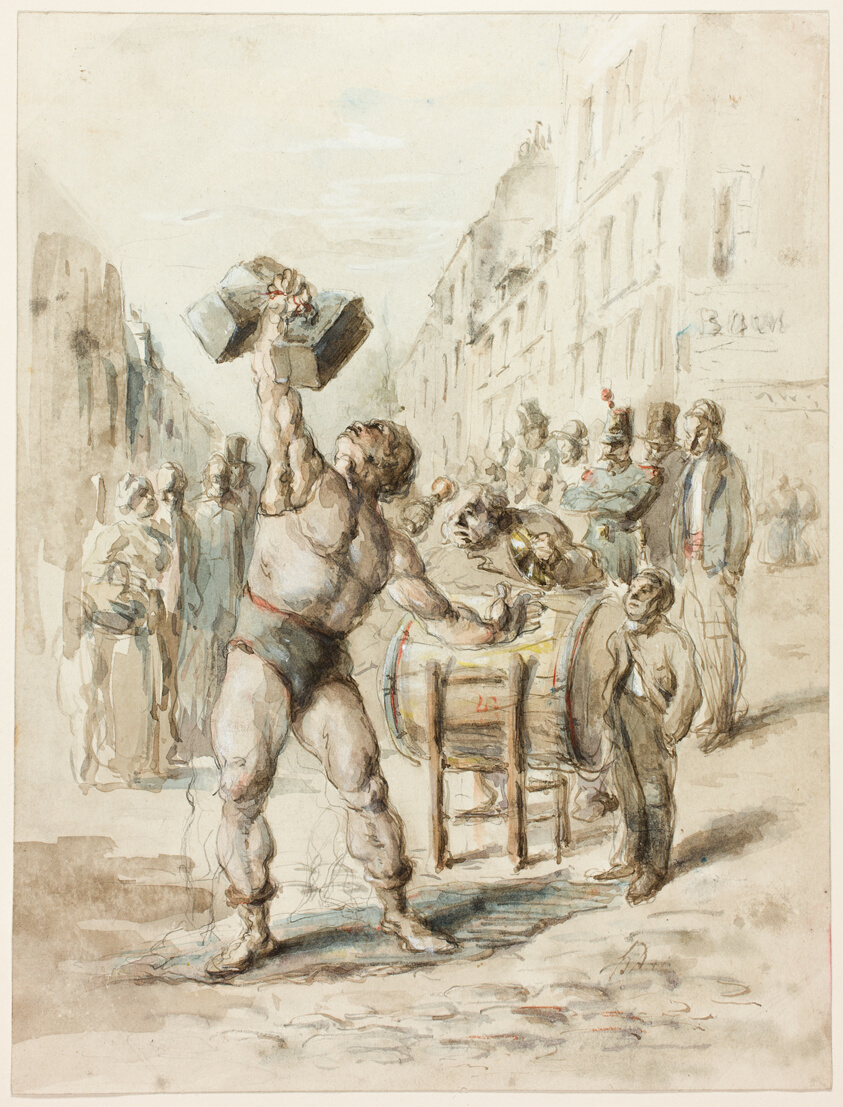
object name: Drawing and Watercolor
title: The Weight Lifter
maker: Attributed to Honoré Victorin Daumier; French, 1808-1879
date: c. 1850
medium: Watercolor, with brush and brown ink, over graphite, on cream wove paper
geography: France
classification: watercolor; drawings (visual works); prints and drawing